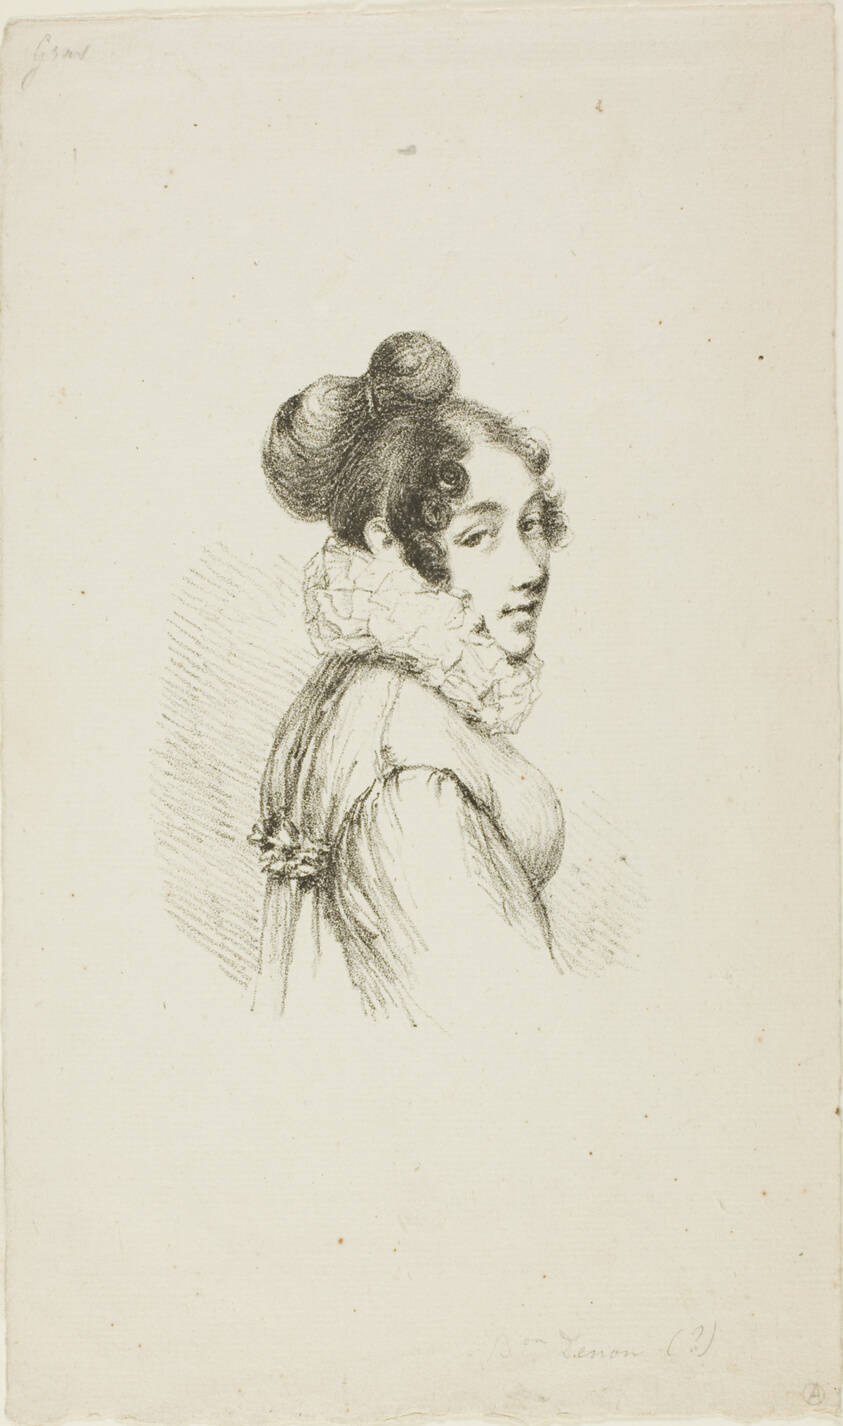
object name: Print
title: Portrait of a Young Lady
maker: Dominique-Vivant Denon (French, 1747-1825)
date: c. 1820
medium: Lithograph in black on cream wove paper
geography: France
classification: lithograph; print; prints and drawing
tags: portraits